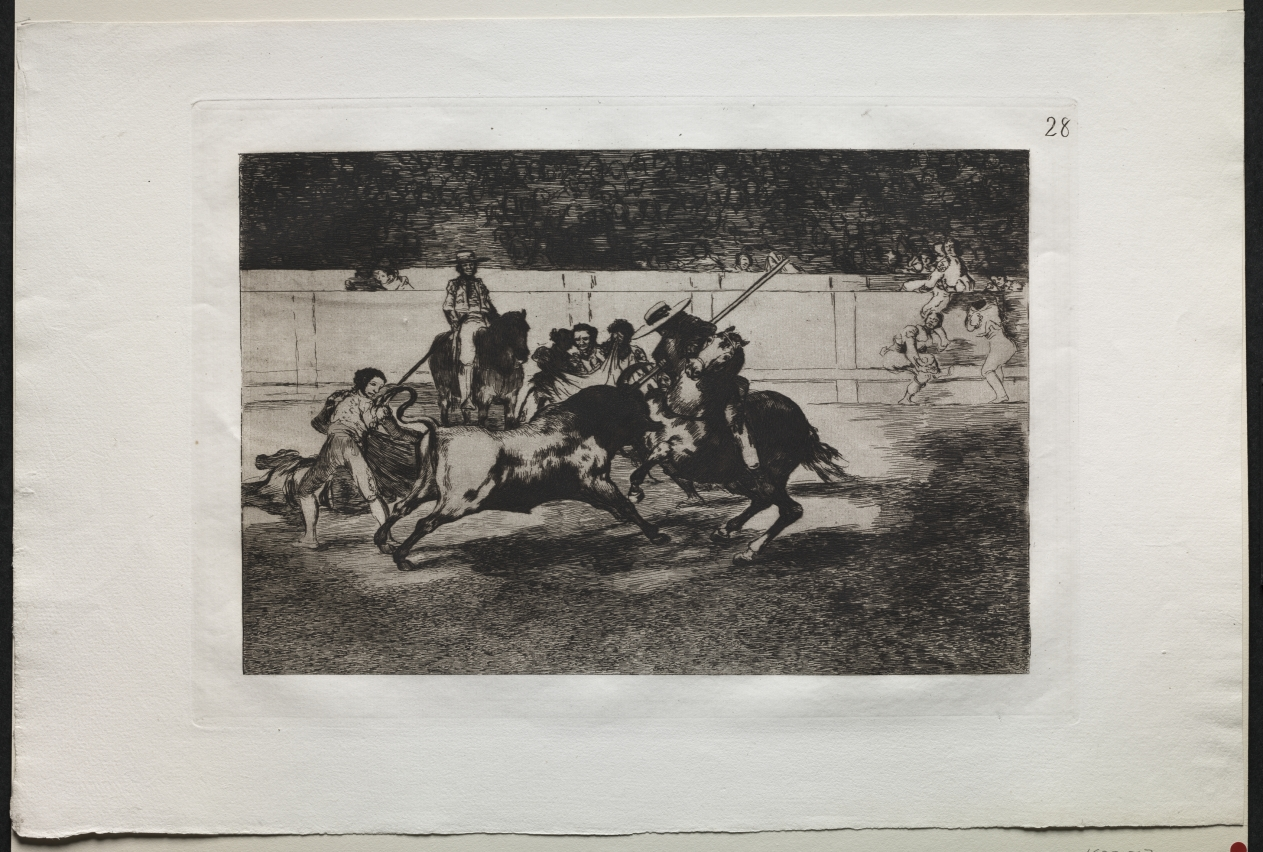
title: Bullfights: The Forceful Rendon Stabs a Bull with the Pique, From Which Pass he died in the Ring at Madrid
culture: Spain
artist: Francisco de Goya (Spanish, 1746–1828)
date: 1816, printed 1876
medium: engraving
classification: Print